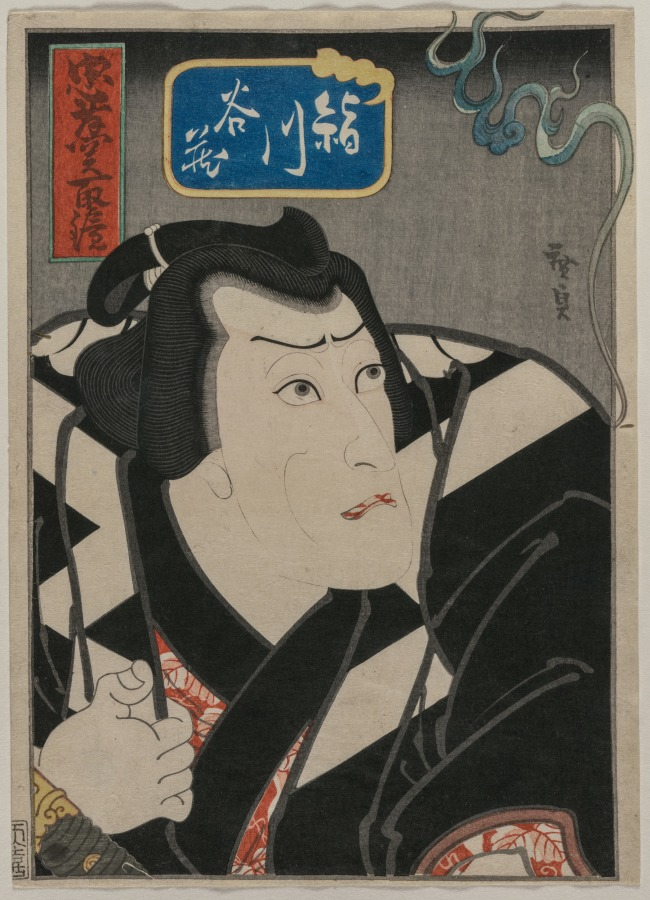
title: Kinugawa Tanizō in A Mirror of Brave and Loyal Wrestlers (Chūkō Sekitori Kagami)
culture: Japan, Edo period (1615–1868)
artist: Gosōtei Hirosada (Japanese)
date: 1848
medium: color woodblock print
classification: Print